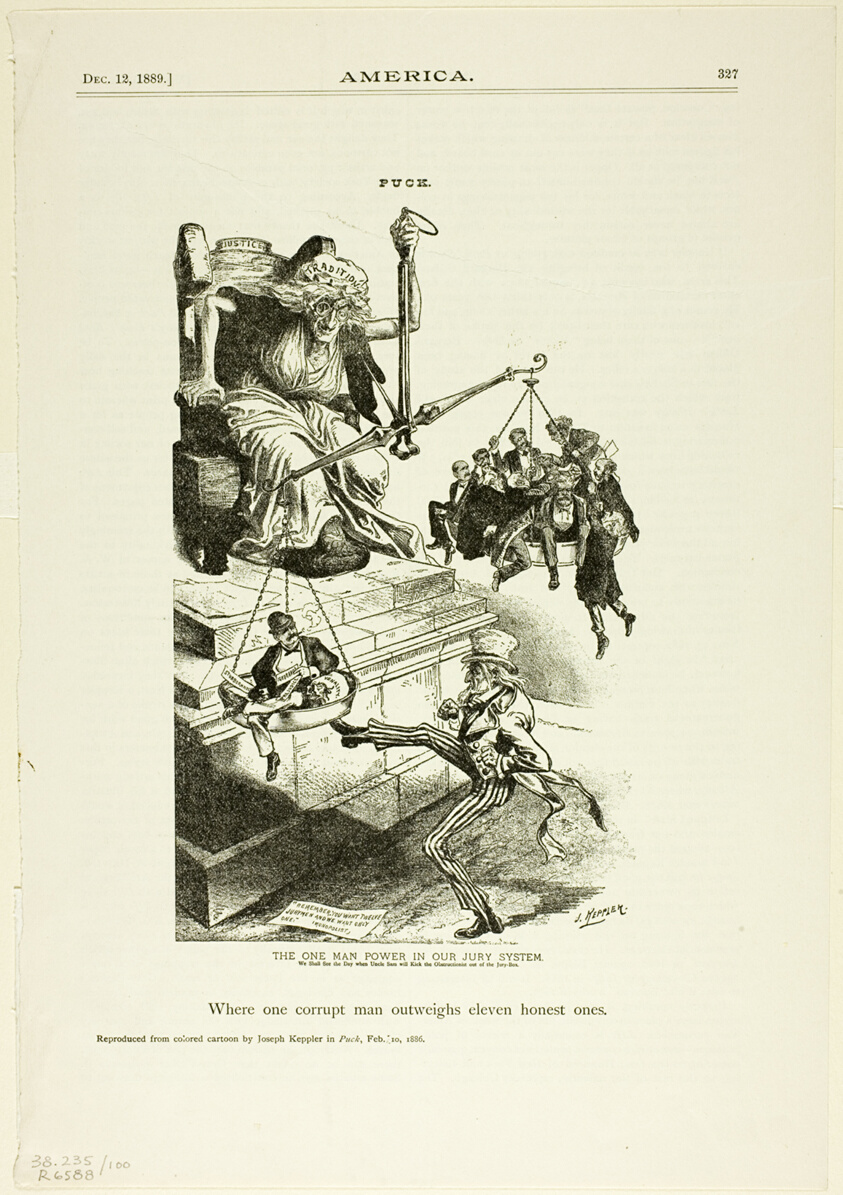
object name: Print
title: The One Man Power in our Jury System, from Puck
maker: Joseph Keppler (American, 1638-1894)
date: published February 10, 1886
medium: Lithograph on newsprint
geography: United States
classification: lithograph; print; prints and drawing